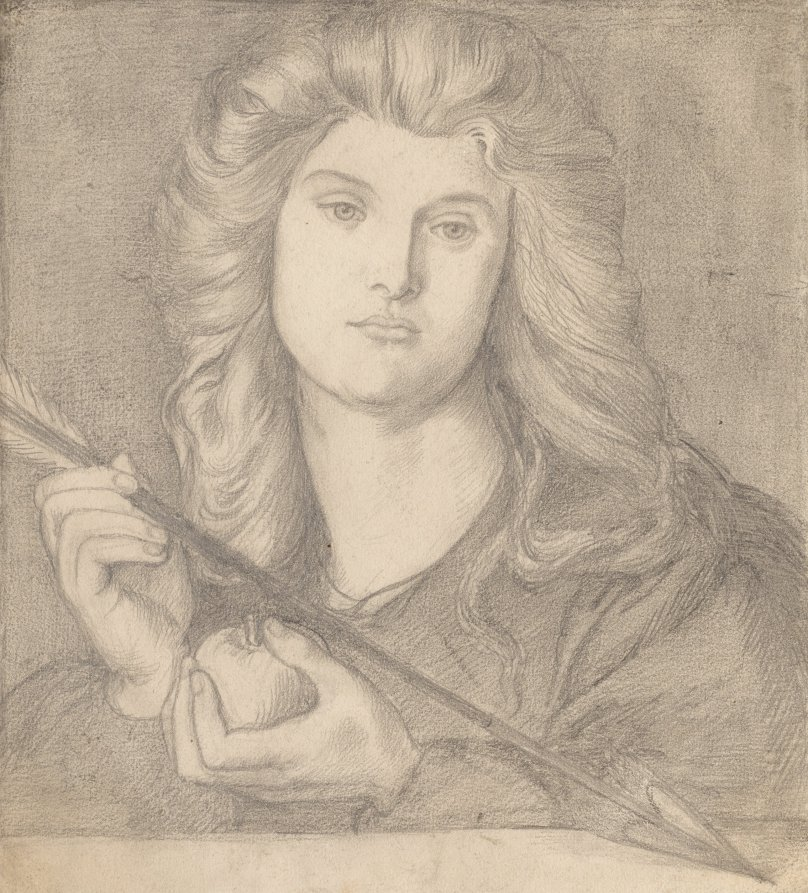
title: Study for "Venus Verticordia"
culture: England, 19th century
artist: Dante Gabriel Rossetti (British, 1828–1882)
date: c. 1864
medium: pencil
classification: Drawing